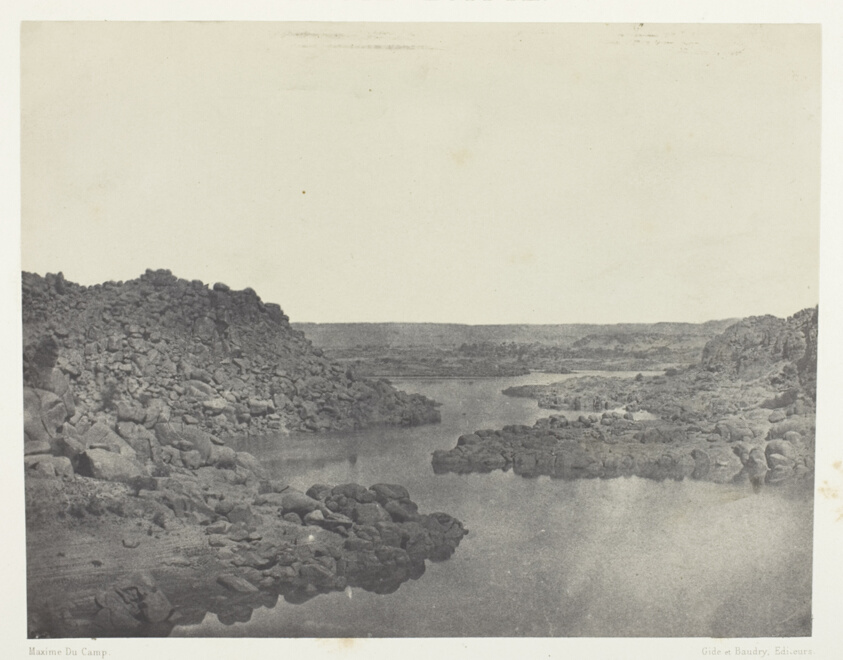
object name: Photograph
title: Sortie de la Première Cataracte, Haute-Egypte, plate 67 from the album "Egypte, Nubie, Palestine et Syrie" (1852)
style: 19th century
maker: Maxime Du Camp (French, 1822–1894)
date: 1849/51, printed 1852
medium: Salted paper print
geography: France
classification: salted paper print; photographic process; photography; photograph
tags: Collected by Hugh Edwards, Egypte, Nubie, Palestine et Syrie